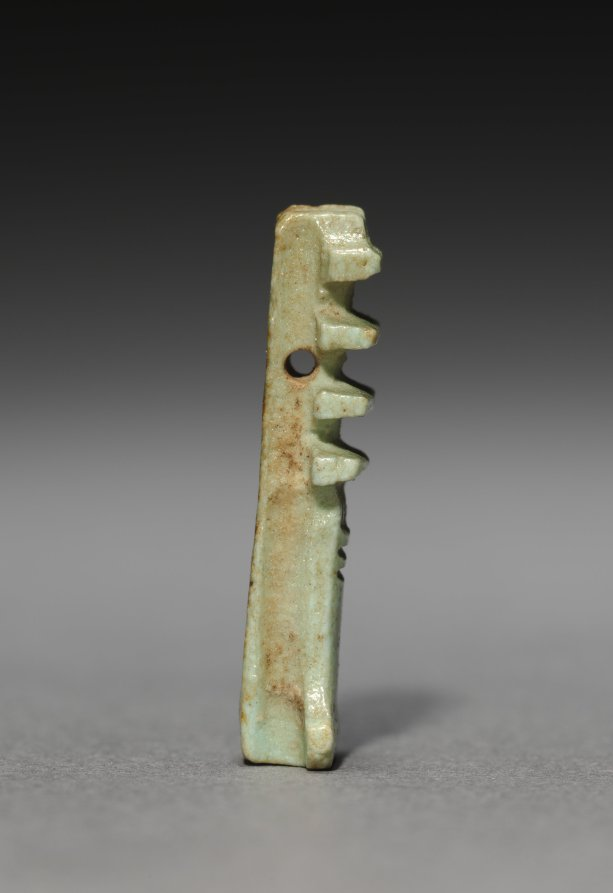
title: Pair of Djed-Pillar Amulets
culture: Egypt, Late period (715–332 BCE), Dynasty 30–Greco-Roman period (332 BCE–395 CE), Ptolemaic dynasty (305–30 BCE)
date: 380–30 BCE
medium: gray-green faience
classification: Amulets